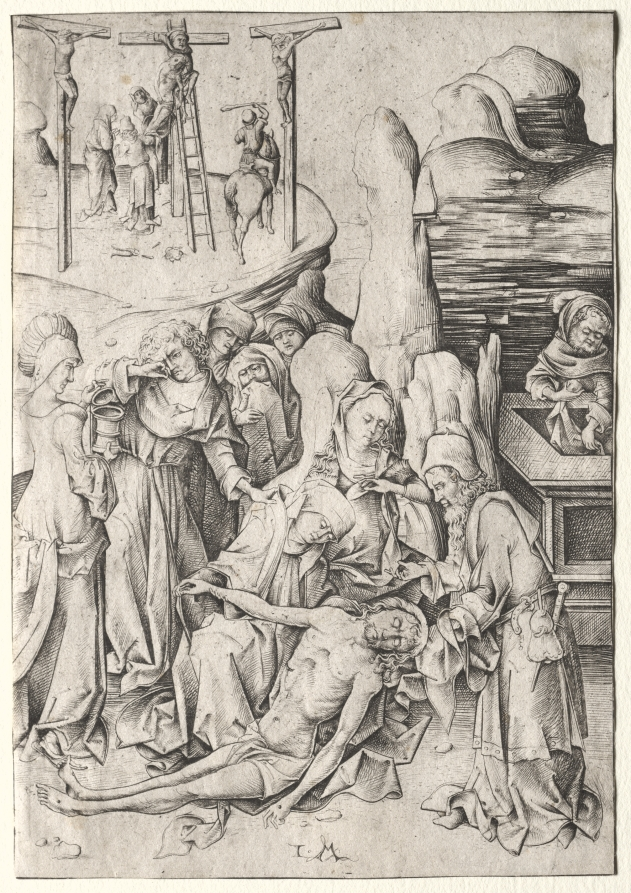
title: The Passion: The Lamentation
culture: Germany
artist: Israhel van Meckenem (German, c. 1440–1503)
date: c. 1480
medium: engraving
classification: Print